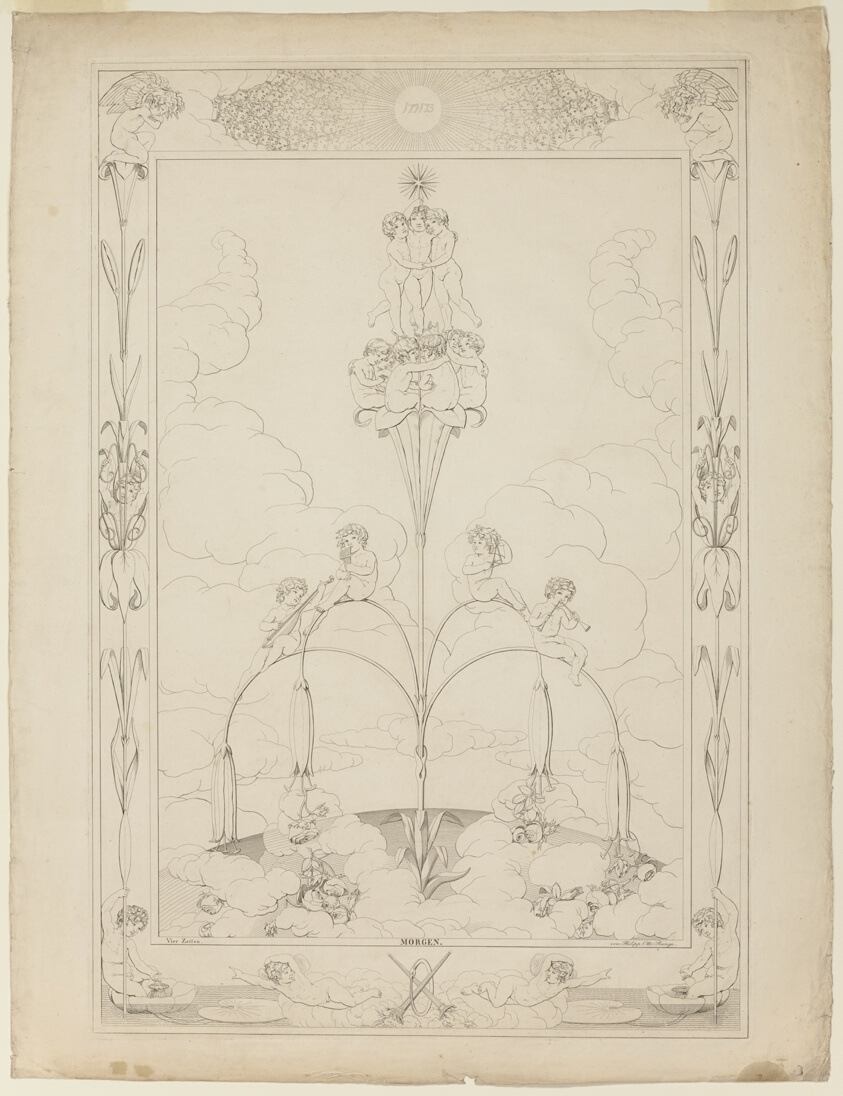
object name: Print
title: Morning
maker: Phillip Otto Runge (German, 1777-1810)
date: 1803/05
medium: Etching and engraving on cream wove paper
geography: Germany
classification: etching; print; prints and drawing